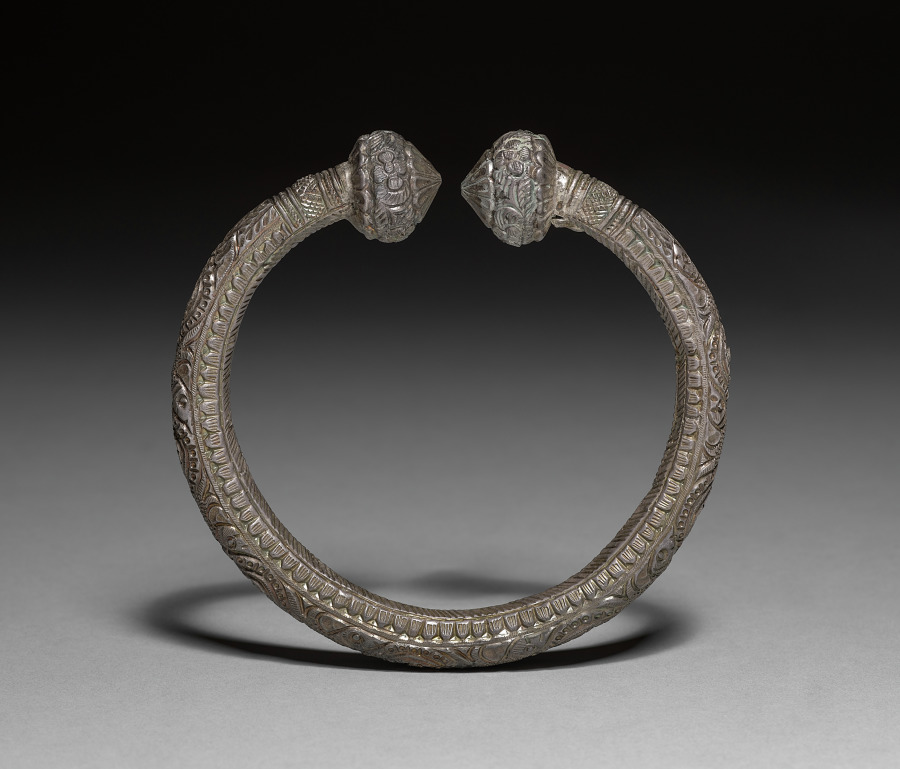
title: Anklet, or Kara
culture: India - Rajputana or Malwa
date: 1800s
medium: silver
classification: Jewelry